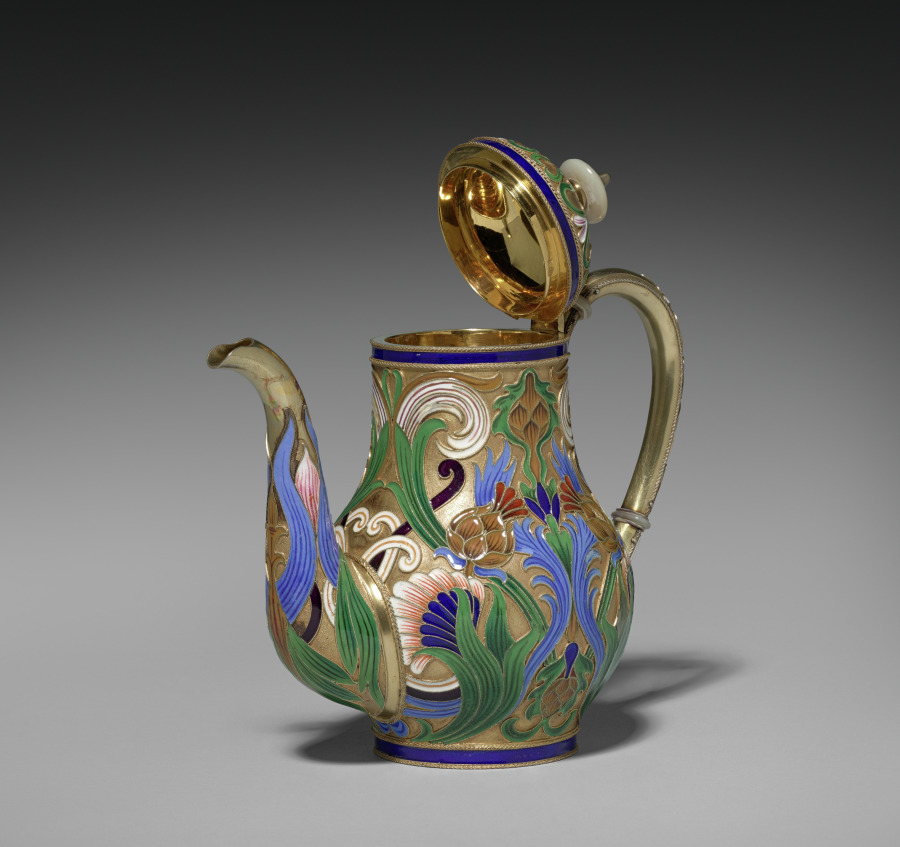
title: Covered Hot Water Pot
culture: Russia, St. Petersburg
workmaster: attributed to Feodor Ivanovich Rückert (Russian, 1840–1917)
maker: House of Fabergé (Russian, 1842–1918)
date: 1887–96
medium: silver gilt, opaque cloisonné enamel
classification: Miscellaneous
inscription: 88, St. George [assay mark for Moscow, 1882-1896]; C. Fabergé (in Cyrillic); double-headed eagle [imperial warrant]; 88; initials of Carl Fabergé (in Cyrillic).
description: Fabergé’s craftsmen in Moscow, especially under the watchful eye of workmaster Feodor Rückert, became known for their work in the pan-Slavic or neo-Russian style, hearkening back to 17th-century motifs of Russian folk art. Often on rather conventional shapes, Rückert and his silversmiths created an explosion of color, achieved through the historic technique of cloisonné enamel in which tiny metal lines are soldered to the surface then filled with glass powders in various colors and fired to create a high gloss finish. The result is a spectacular evocation of the 17th-century originals. Far from mere copies, however, Rückert's designs, such as this tea service, employ naturalistic or abstract motifs in a thoroughly modern adaptation of a remarkable earlier period of Russian art and decoration.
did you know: This covered hot water pot is part of a larger tea set.